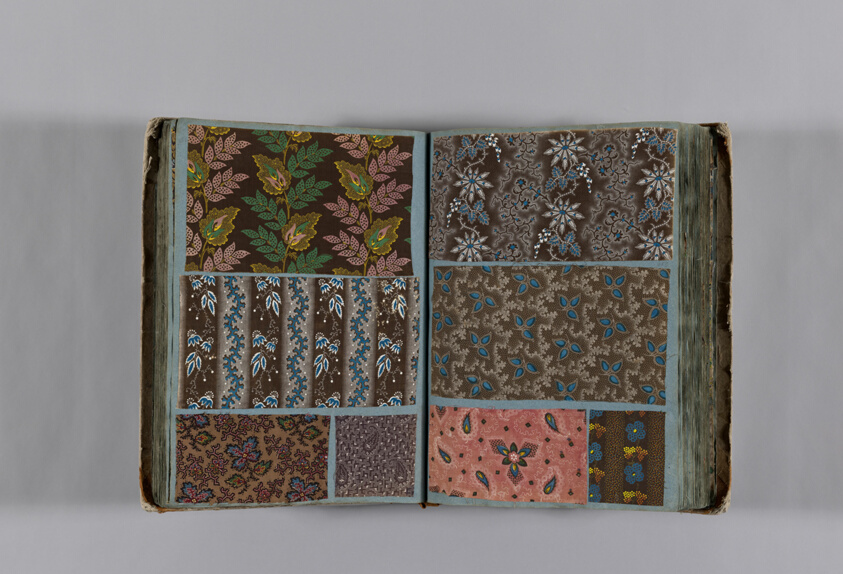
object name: Book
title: Sample book of swatches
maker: Mulhouse, France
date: 19th c.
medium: Sample book of swatches: cotton, plain weave, block printed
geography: France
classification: book; printed; weaving - printed